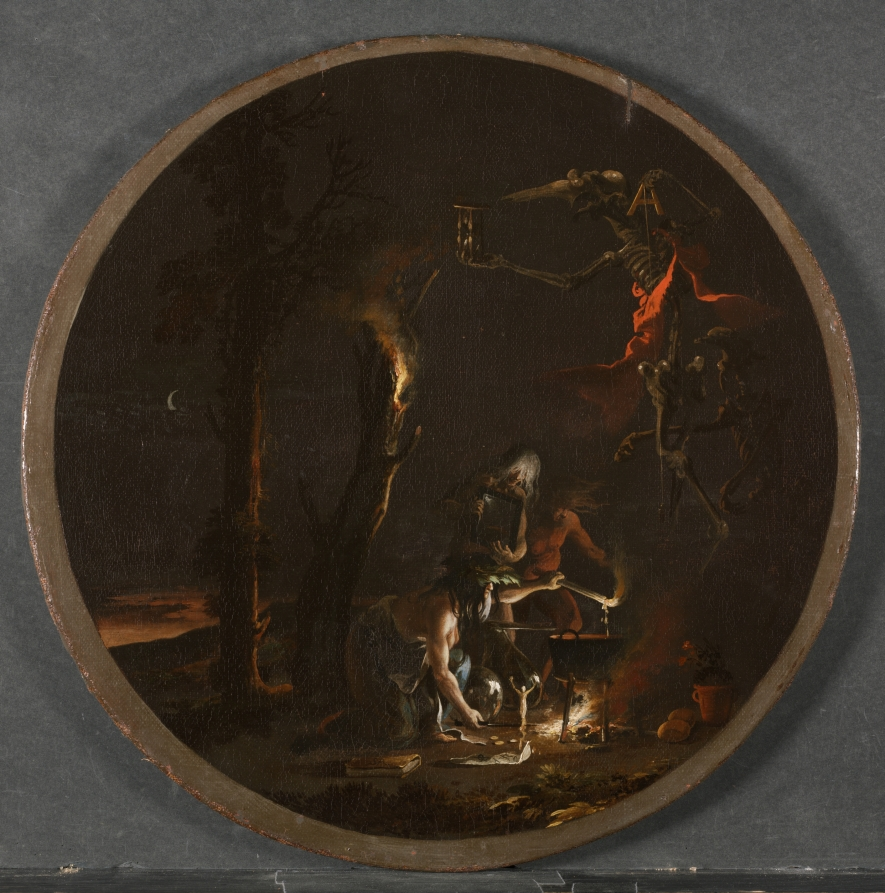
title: Scenes of Witchcraft: Evening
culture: Italy, 17th century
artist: Salvator Rosa (Italian, 1615–1673)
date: c. 1645–49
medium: oil on canvas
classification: Painting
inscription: Signed: "SR [monogram]"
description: At dusk, Rosa's hags gather around a cauldron. Above their incantations soars a conjured skeleton holding an hourglass symbolizing the brevity of life. In its left hand, the demonic creature holds a capital letter A from which extends a plumb line; as ancient signs of the moon and judgment, this strange combination of symbols embodies the nocturnal judgment the witches are doling out below. Though more rare in paint, the detailed portrayal of witches at their spells enjoyed a long literary tradition. The wax effigy alludes to classical literature by Virgil and Horace that described love magic. Poets in the 1500s and 1600s continued the tradition, writing verse about witches concocting potions and performing love spells. In Rosa's own poem "La Strega (The Witch)," the jilted Phyllis vows to take revenge on her feeble lover, listing the ingredients for her black magic: "ground powders, mystic gems, snakes and owls, stinking blood. . . ." Painting was considered "mute poetry" in the 1600s, and Rosa often explored the same themes in his written and painted art—a clever way to gain fame as a unique intellect.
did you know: The artist chose the painting's shape to reference the foundational role of the circle in practicing magic.